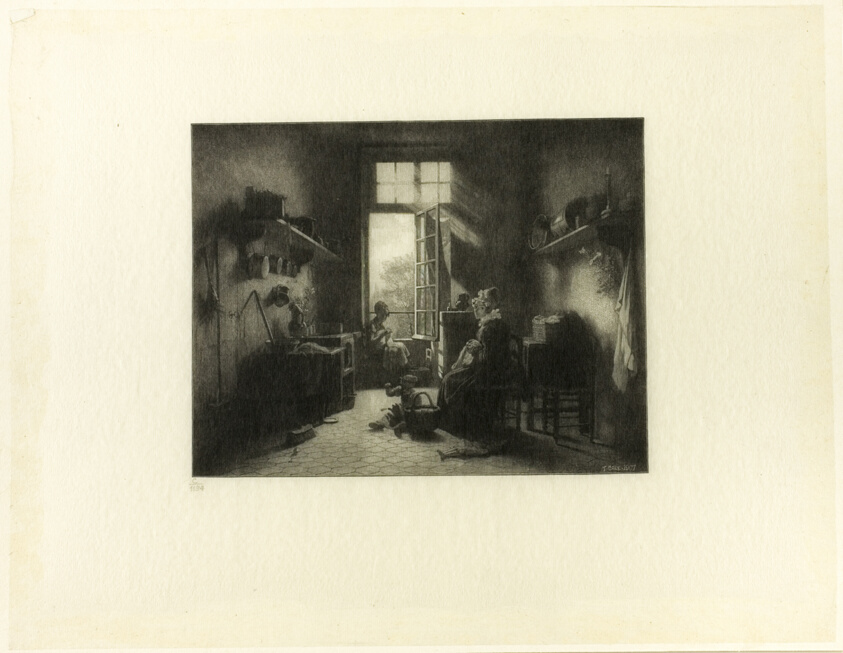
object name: Print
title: Interior of a Kitchen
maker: Timothy Cole (American, born England, 1852-1931); after Martin Drolling (French, 1752-1817)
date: 1907, after the painting of 1817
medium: Wood engraving on China paper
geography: United States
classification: wood engraving; prints and drawing; print